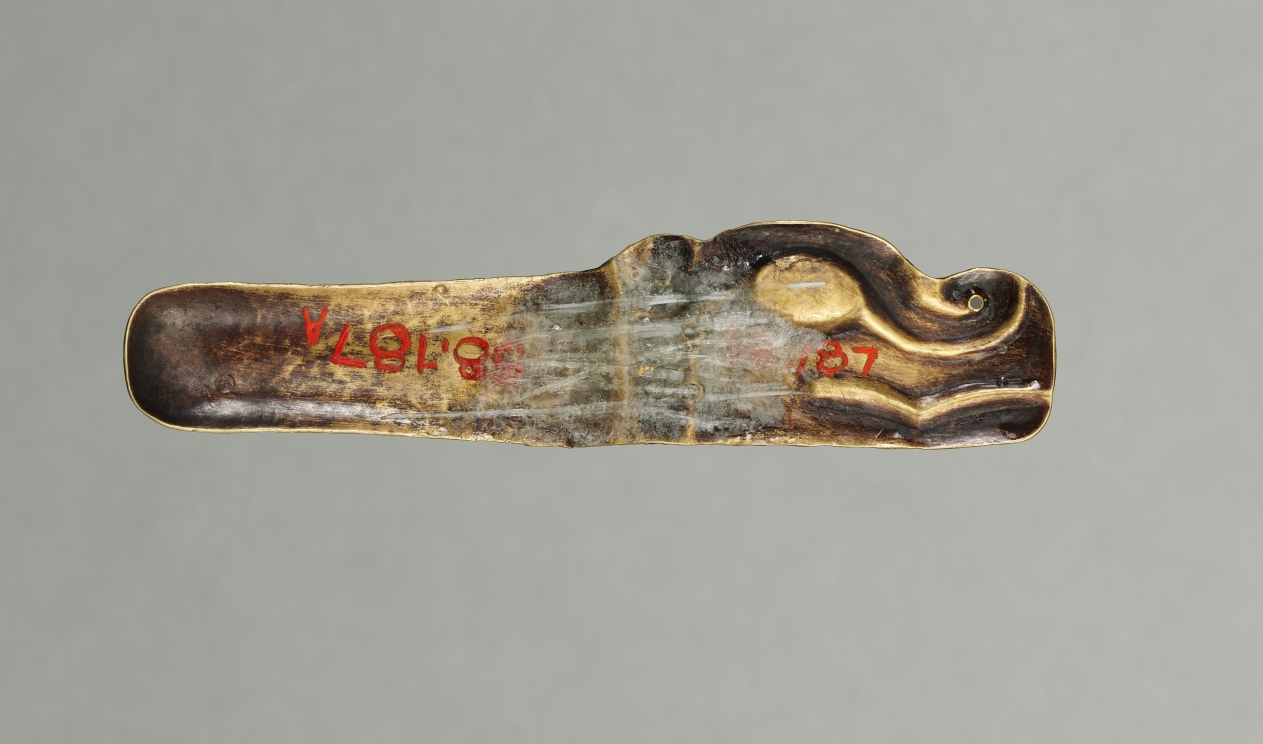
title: Spoon(?)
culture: Peru, North Highlands, Chavín de Huantar(?), Chavín style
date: c. 500–200 BCE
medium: hammered and cut gold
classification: Metalwork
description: There seems to be a link between Chavín religion and appearance of the Andes’ first large precious-metal objects, made using revolutionary new metallurgical processes. Chavín may have developed these technical innovations to express the inexpressible, the "wholly other" nature of its religion. In many areas, elite men and women wore the ornaments as emblems of their ties to this religion, and eventually were buried with them. These 16 objects, along with three others not in the museum’s collection, are said to have come as a group from Chavín itself.